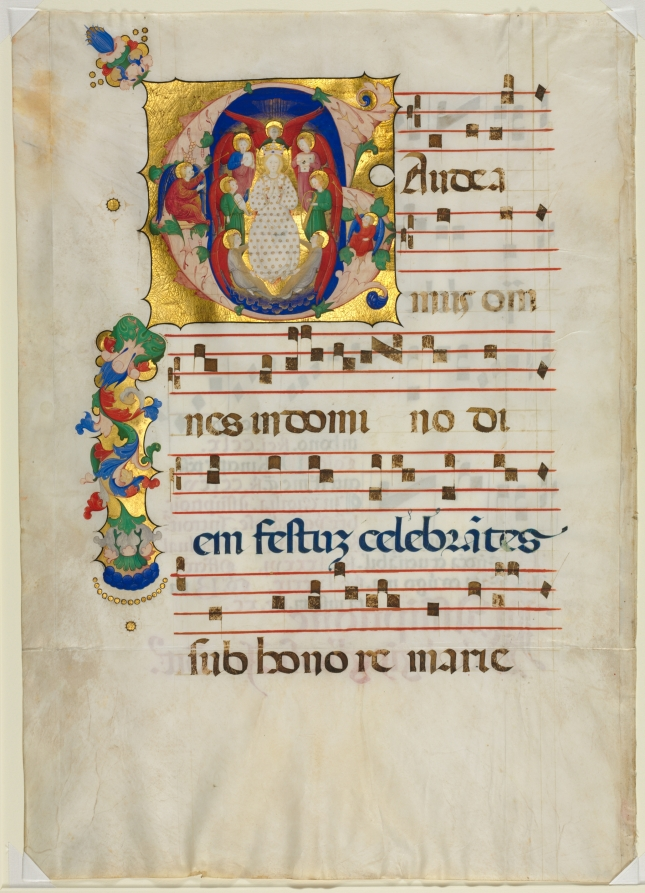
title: Leaf from a Gradual with Historiated Initial (G): Mary as Queen of Heaven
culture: Italy, Lombardy, Milan?, 15th century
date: c. 1425–1450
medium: ink, tempera, and gold on parchment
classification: Manuscript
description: This initial G introduces the Feast of the Assumption (August 15) in the gradual, a choir book used for singing the Latin Mass. The historiated initial bears the image of the Virgin, alone and unaccompanied by saints, borne aloft by angels. The Virgin was believed to have been assumed into heaven, body and soul, three days after her death. Here she is surrounded by a host of angels who play musical instruments, suggesting the celestial realm.